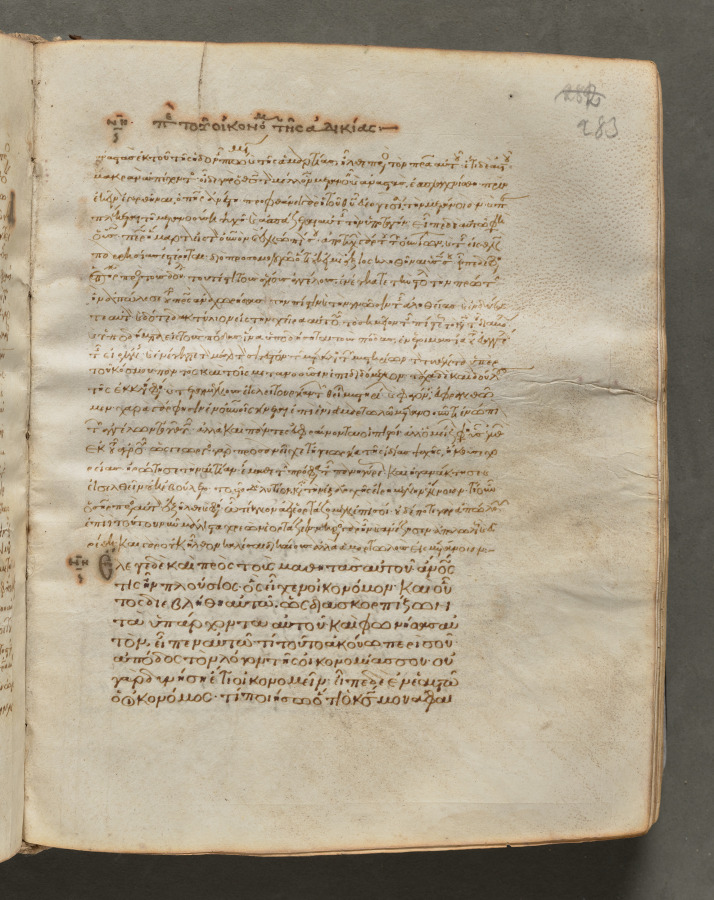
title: Text, folio 283 (recto), from a Gospel Book with Commentaries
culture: Byzantium, Constantinople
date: c. 1000–1100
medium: ink, tempera, and gold on vellum; leather binding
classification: Bound Volume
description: Each of the four gospels in this book opens on a page with brilliantly illuminated borders depicting the author of the text as well as birds—principally peacocks, symbols of the immortality of the soul—and fountains, representing the fountain of life and the salvation of the soul. This volume consists of 428 leaves with texts in Greek. Its level of sophistication suggests that it was probably written and decorated in a monastery in Constantinople.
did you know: Gospel books were carried in procession through Byzantine churches.